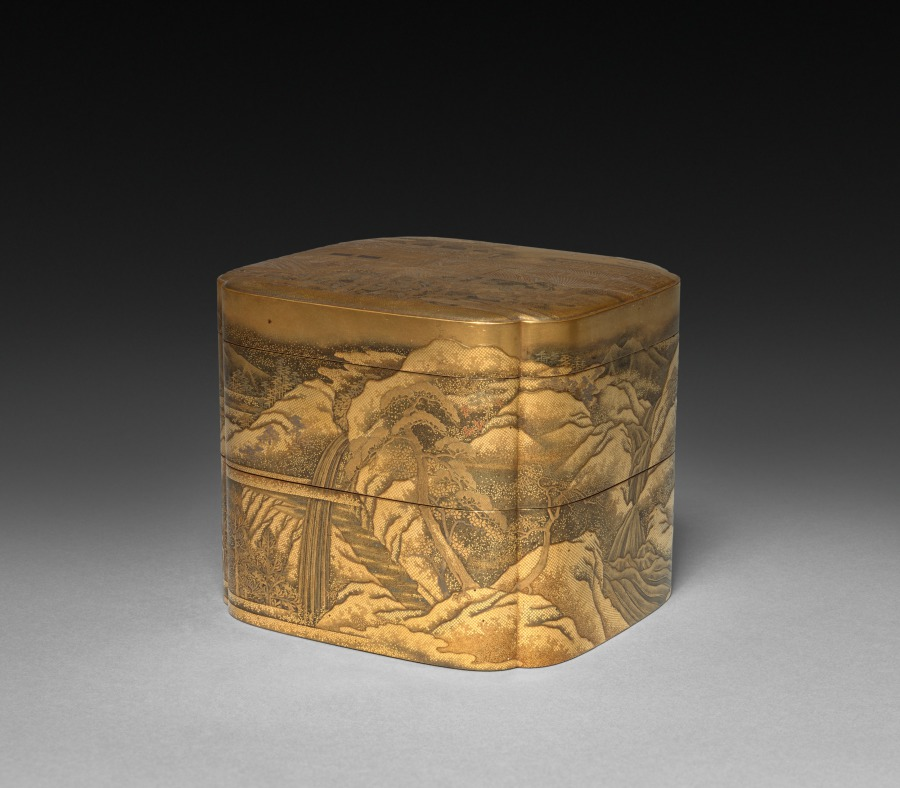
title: Covered Box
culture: Japan, Meiji period (1868–1912)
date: late 1800s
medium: wood with lacquer and gold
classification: Lacquer